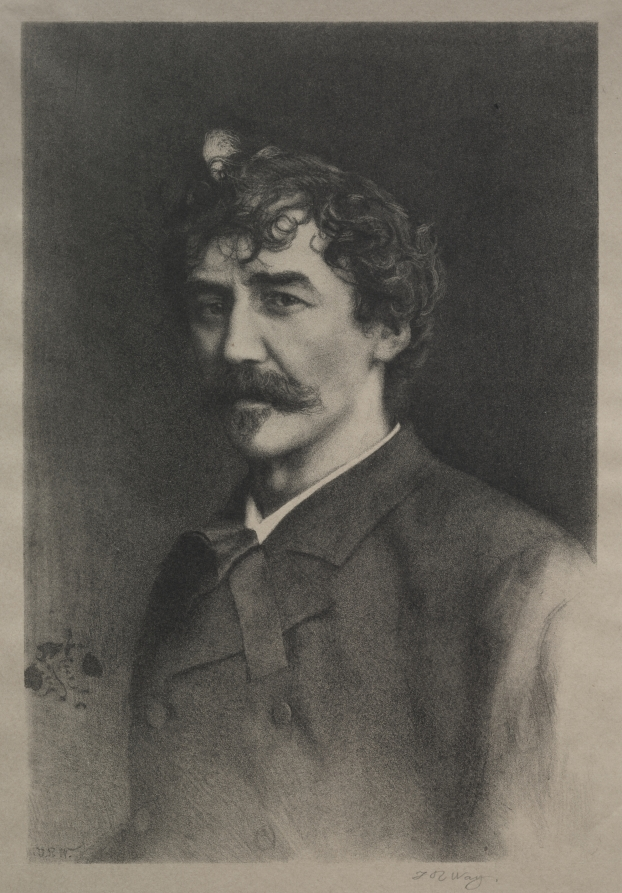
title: James MacNeill Whistler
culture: England, 19th century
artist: Thomas Robert Way (British, 1861–1913)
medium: lithograph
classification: Print